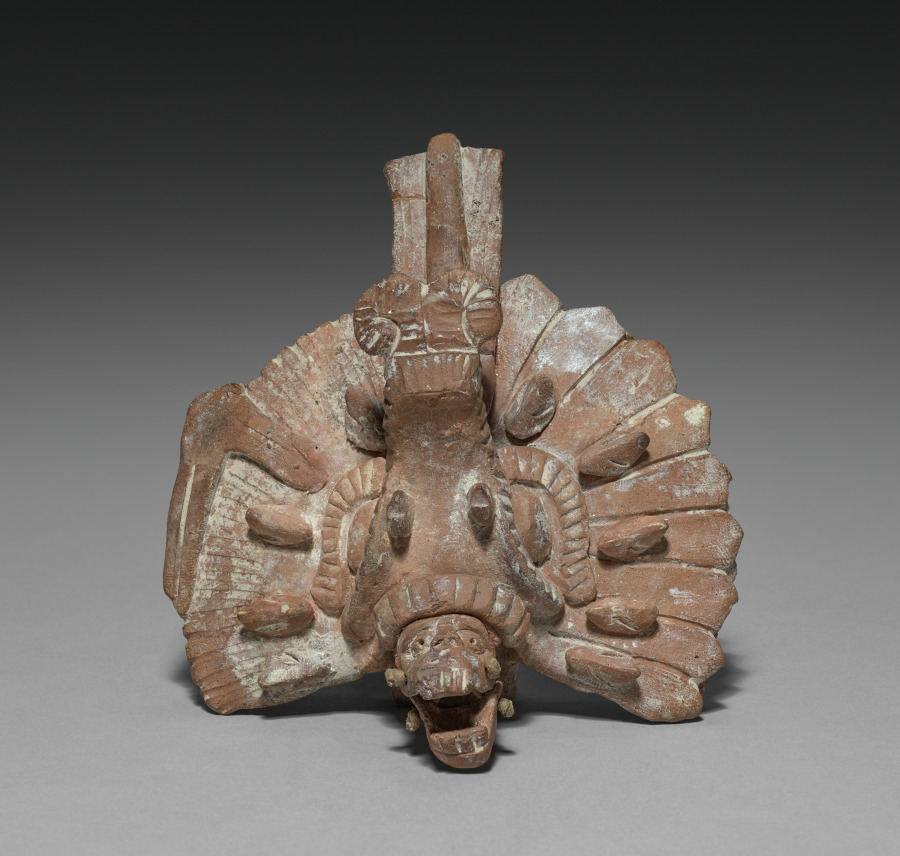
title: Seated Lord with Removable Headdress: Headdress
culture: Mesoamerica, Maya, probably Jaina Island, Late Classical period, 7th-9th century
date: 600–800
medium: ceramic and slip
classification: Ceramic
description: The major Maya grave offerings on Jaina Island were ceramic figurines that depict deities and humans in a variety of roles. The headdress belongs to a seated figure who represents a male, perhaps another warrior, who wears a huge zoomorphic headdress. A skeletal face with articulated jaw descends from the headdress to fit as a mask over the figure’s face.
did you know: It is estimated that some 20,000 people were buried on the tiny island of Jaina over a 500-year period.